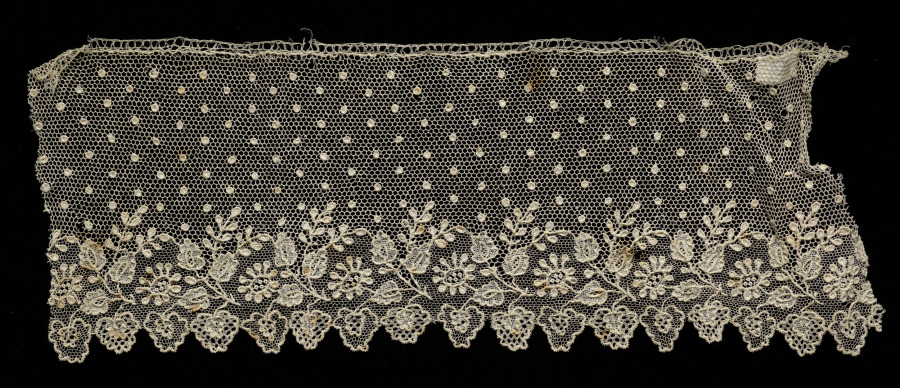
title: Lace Edging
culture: France, Alençon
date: 1700s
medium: Linen: needle lace (Point d'Alençon)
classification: Lace